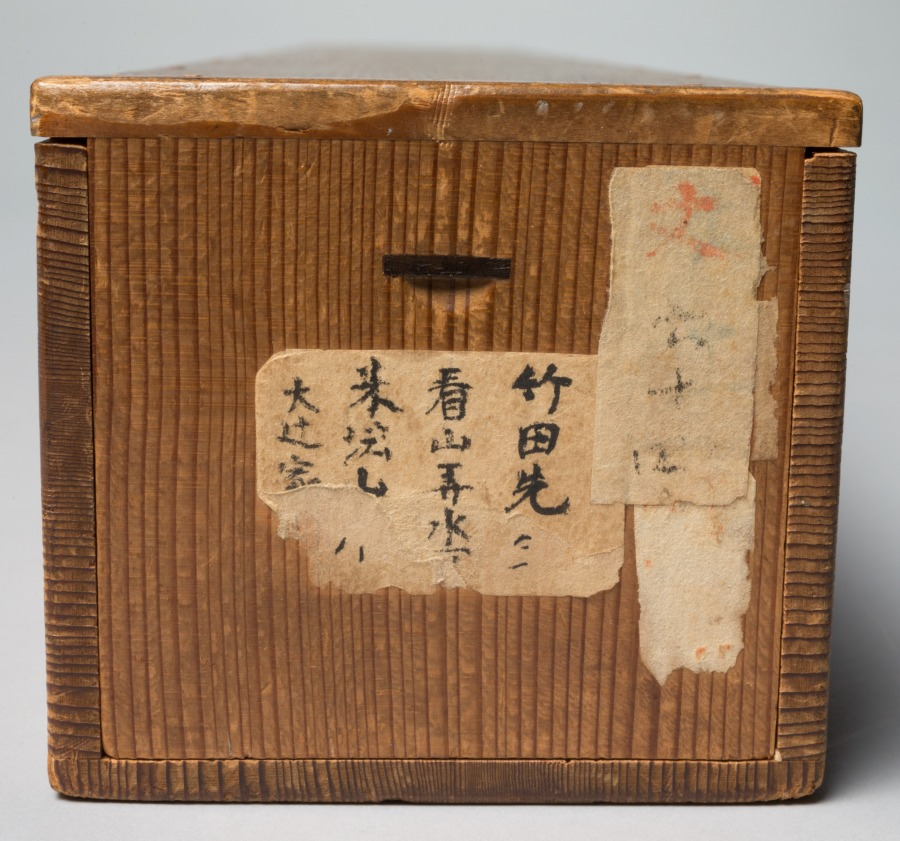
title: Mountain View and Blue Water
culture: Japan, Edo period (1615–1868)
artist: Tanomura Chikuden (Japanese, 1777–1835)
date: early 1800s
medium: hanging scroll; ink, color, and gold on paper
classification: Painting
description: Tanomura Chikuden was an eminent painter whose adopted son, Tanomura Chokunyū (1814–1907), was Seifū Yohei III’s painting teacher. This work was displayed at a gathering commemorating the 10th anniversary of Chokunyū’s death, something we know only because its custom-made box and archival documents have been carefully kept together. The box inscription also confirms that Chikuden was emulating the style of the Mi family of painters, active during China’s Southern Song dynasty (1127–1279). The painting’s Chinese-style silk wrapper is inscribed and sealed on its interior by members of Chokunyū’s community.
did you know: The mountain shapes are built up with multiple small wet strokes.